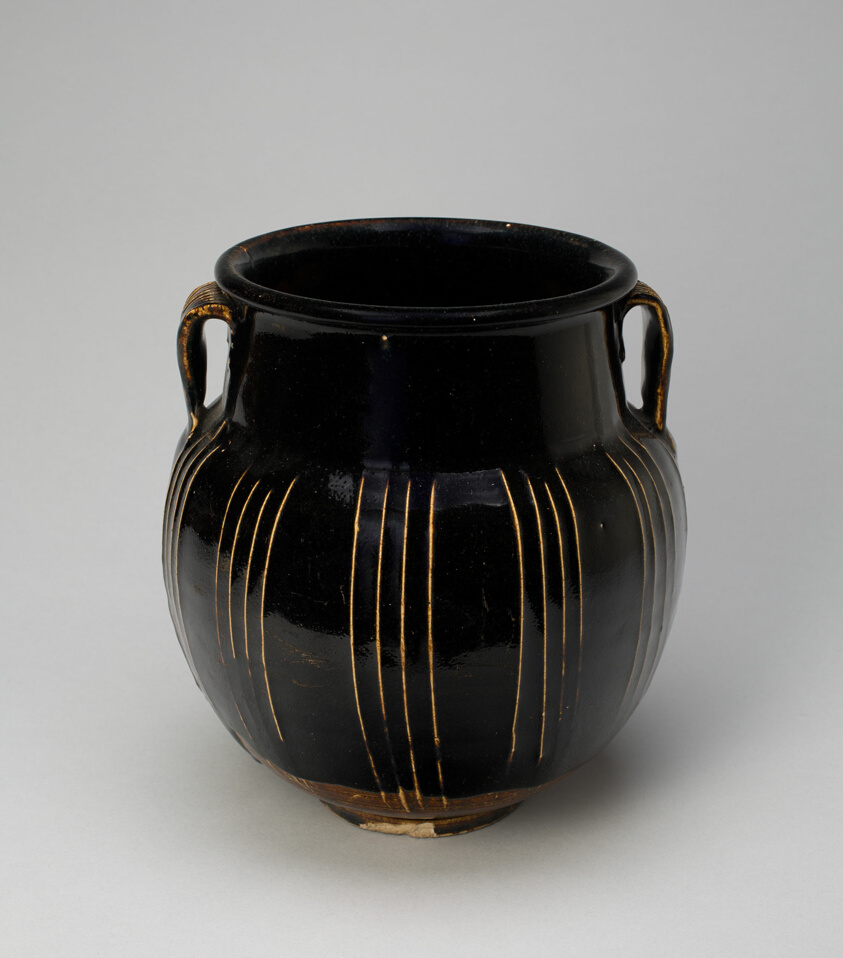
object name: Vessel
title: Ovoid Jar with Vertical Ribs and Two-Loop Handles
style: Chinese (culture or style)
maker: China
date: Northern Song (960–1127) or Jin dynasty (1115–1234), 12th/13th century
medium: Northern black ware; Cizhou type; glazed stoneware with trailed white slip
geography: China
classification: stoneware; asian art; ceramics; vessel